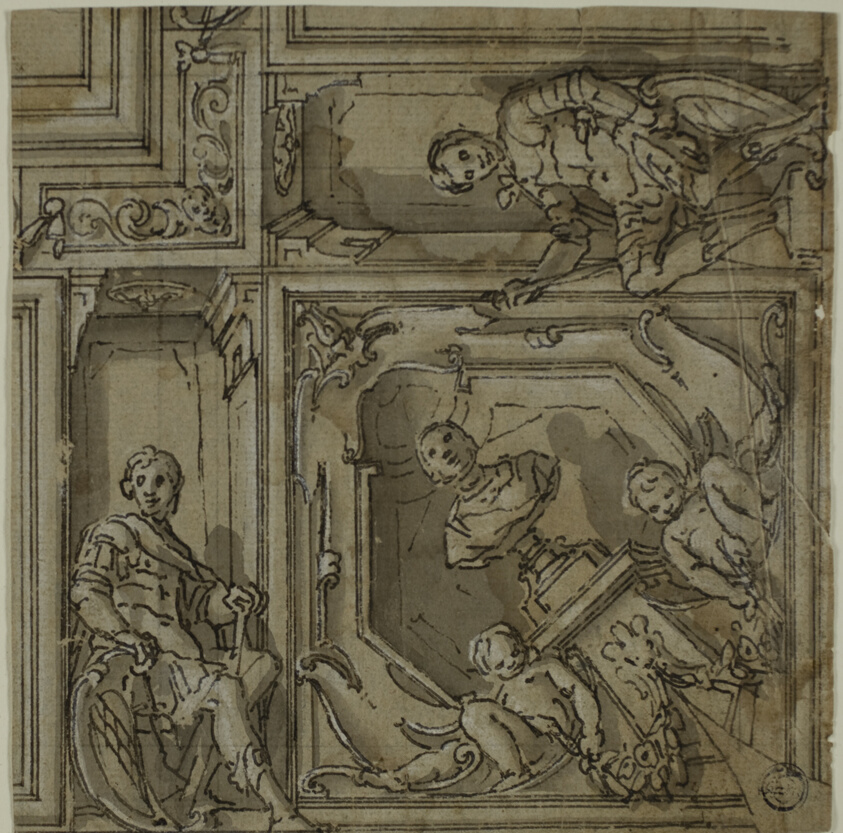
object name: Drawing and Watercolor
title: Design for Corner of a Ceiling Decoration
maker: Lazzaro Tavarone (Italian, 1556-1641)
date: 1590/1614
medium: Pen and brown ink, with brush and gray wash, heightened with white gouache, on gray laid paper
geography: Italy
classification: ink with wash; drawings (visual works); prints and drawing